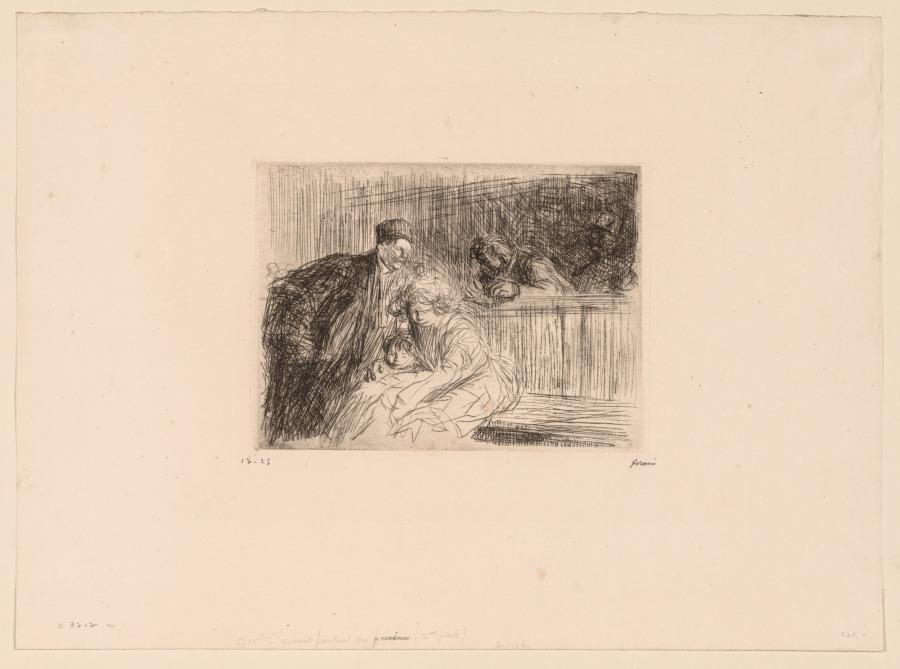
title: L'Avocat Parlant au prevenu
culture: France, 19th-20th century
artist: Jean Louis Forain (French, 1852–1931)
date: 1909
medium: etching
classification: Print